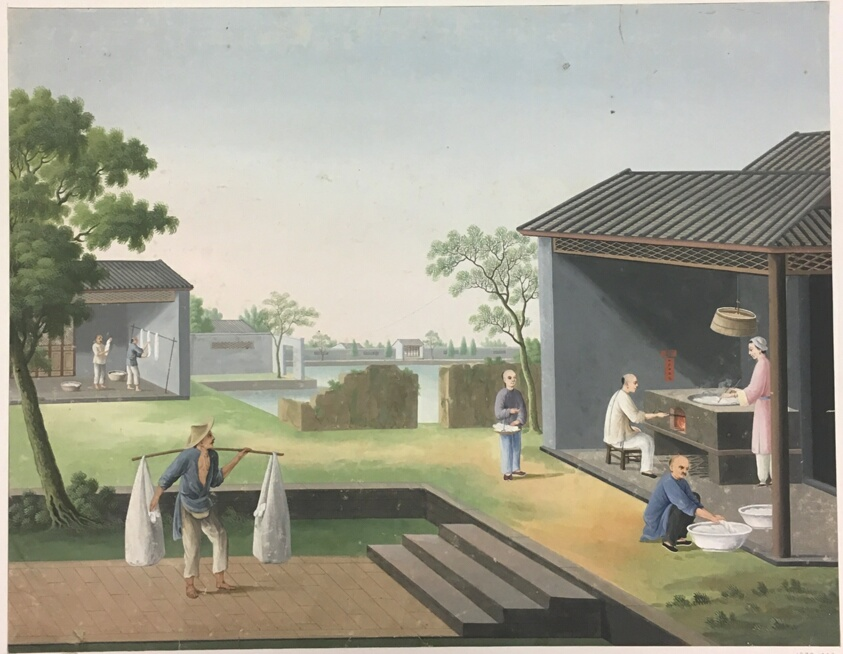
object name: Painting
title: Spinning Cloth, Preparing Tea Leaves, Preparing Silk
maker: China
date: Early 19th century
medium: Colors on paper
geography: China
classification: painting; asian art; print